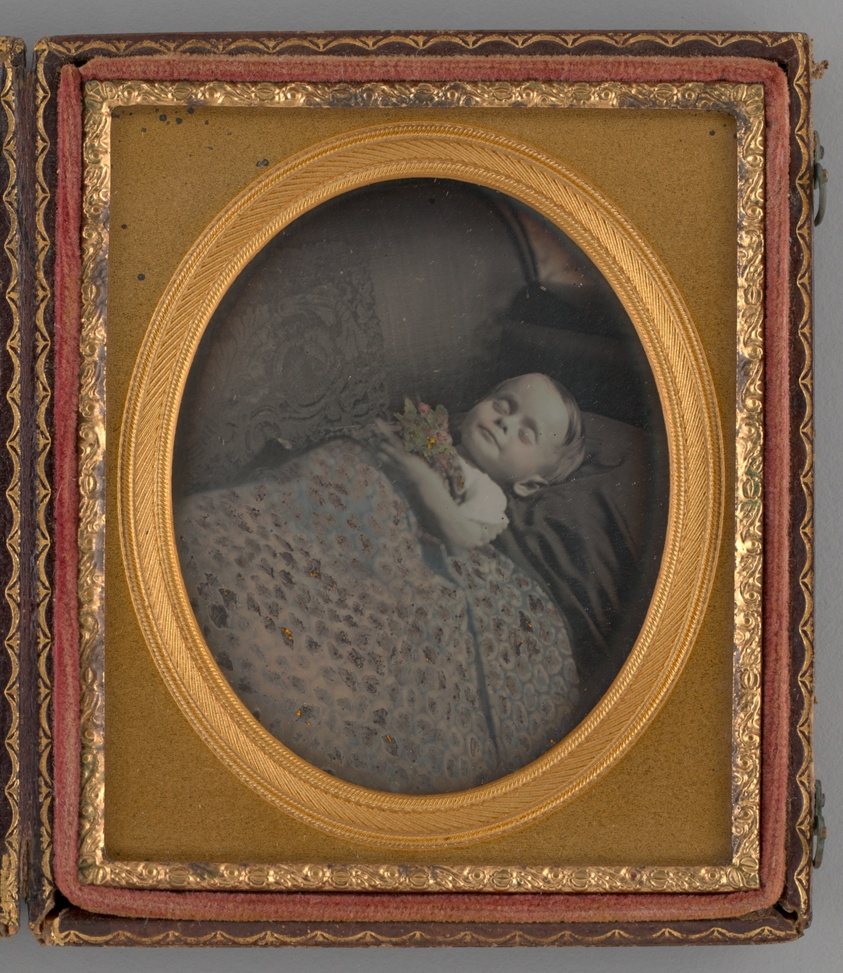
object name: Photograph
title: Untitled (Post Mortem Portrait of a Baby)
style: 19th century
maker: Unknown maker; American, 19th century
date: 1855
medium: Daguerreotype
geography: United States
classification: portrait; photography; photographic process; photograph; daguerreotype; portrait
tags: lundberg collection, children, portrait, photography, post mortem portrait, babies, portraits, portraits: child subject